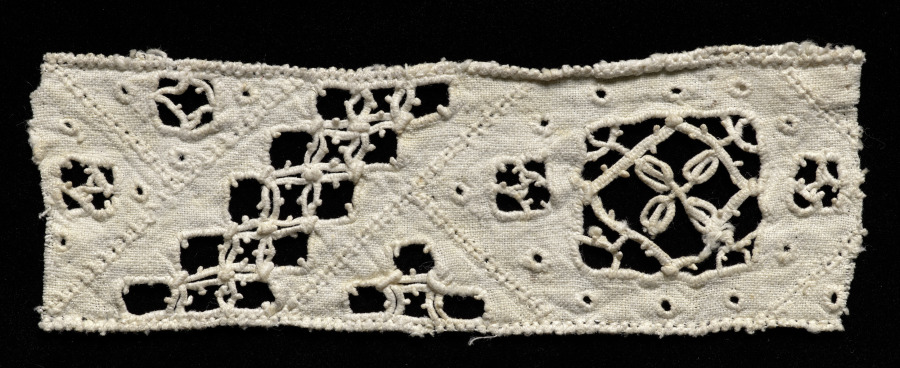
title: Lace Fragment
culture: Italy, 1600s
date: 1600s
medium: Linen: needle lace (cutwork)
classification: Lace